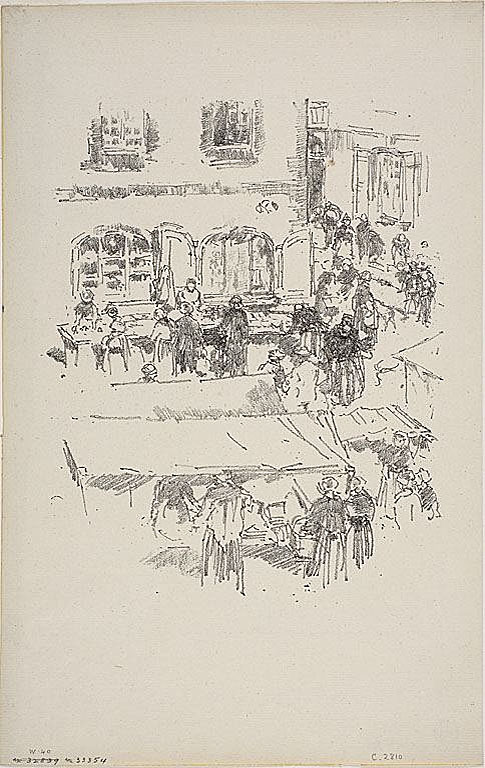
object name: Print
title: The Marketplace, Vitré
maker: James McNeill Whistler (American, 1834-1903)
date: 1893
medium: Transfer lithograph in black on ivory laid paper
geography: United States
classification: transfer lithograph; lithograph; print; prints and drawing; paper